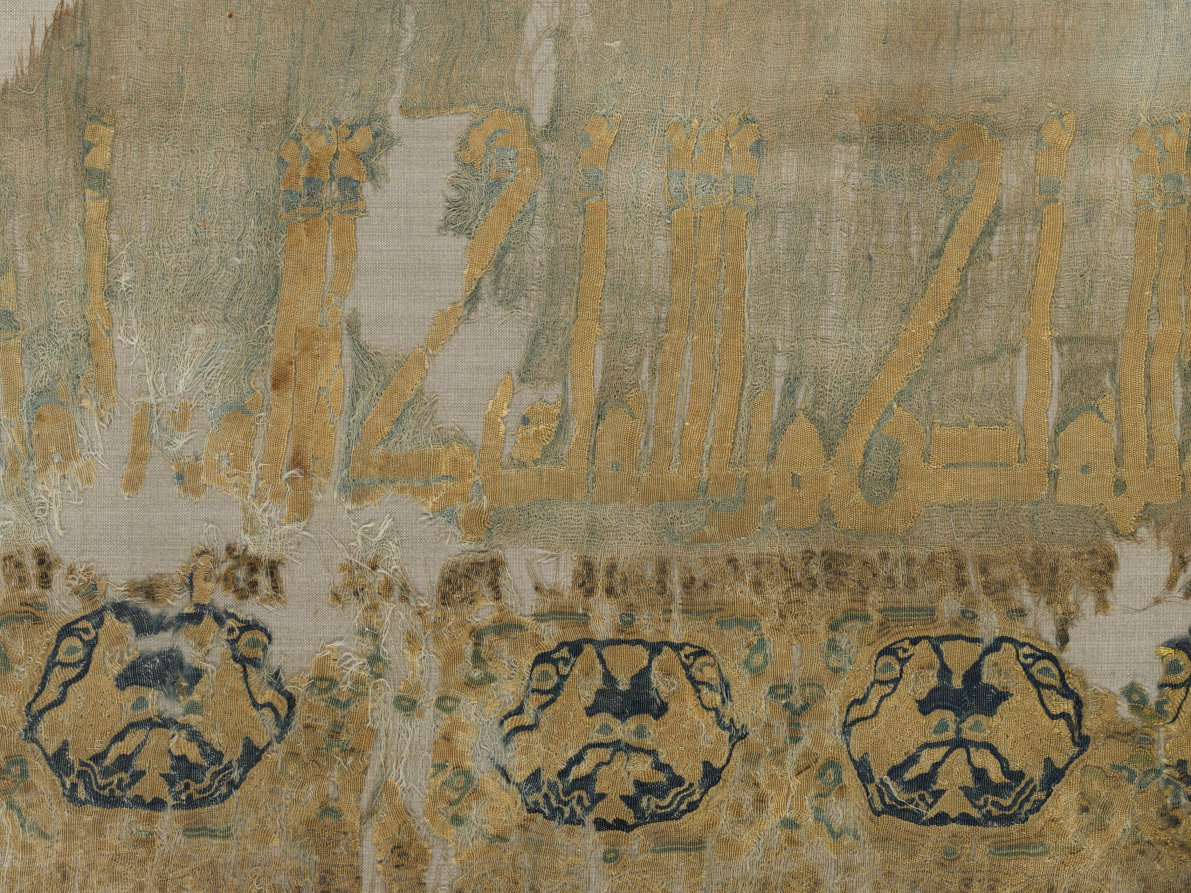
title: Turban end with tiraz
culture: Egypt, Tinnis, Fatimid period, datable to 983-90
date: 983–990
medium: plain weave with inwoven tapestry weave: linen and silk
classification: Textile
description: This finely woven linen cloth, dyed a cherished pistachio color, was cut from a longer fabric worn folded and wrapped as a turban with the silk tapestry-woven decoration shown off in the front. It contains two opposing rows of nearly identical Arabic text separated by a row of medallions displaying a pair of birds. The historical text begins by praising Allah, asking that he assist the Caliph al-‘Aziz and bless him and his ancestors. The inscription also specifies that the vizier Abu ibn Yusuf ordered the cloth from the private factory (tiraz) in Tinnis. This luxurious cloth could have been a gift from the caliph in Cairo during the Fatimid period to a courtier or visiting dignitary. It is one of the finest known examples.